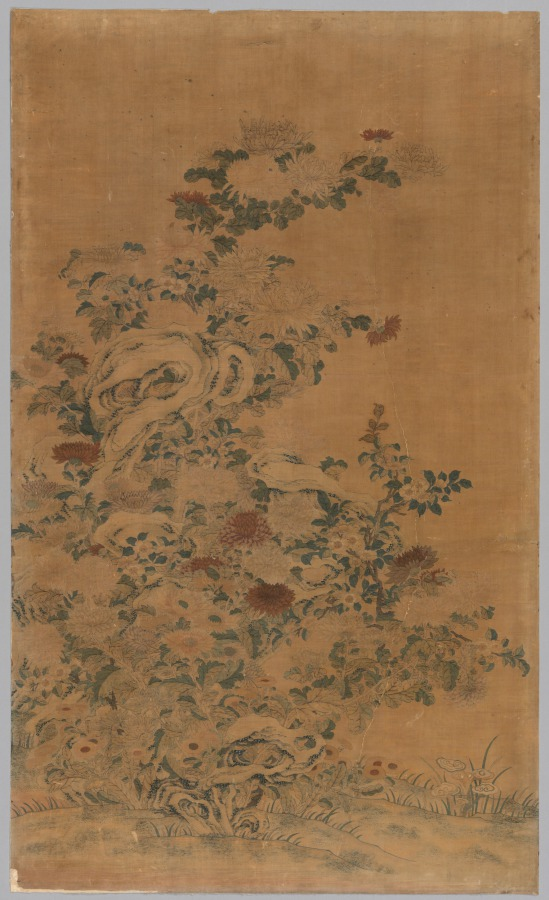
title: Kesi Panel: Rocks and Chrysanthemums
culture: China, Qing dynasty (1644-1911)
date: 1700s–1800s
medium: Silk; embroidered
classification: Textile